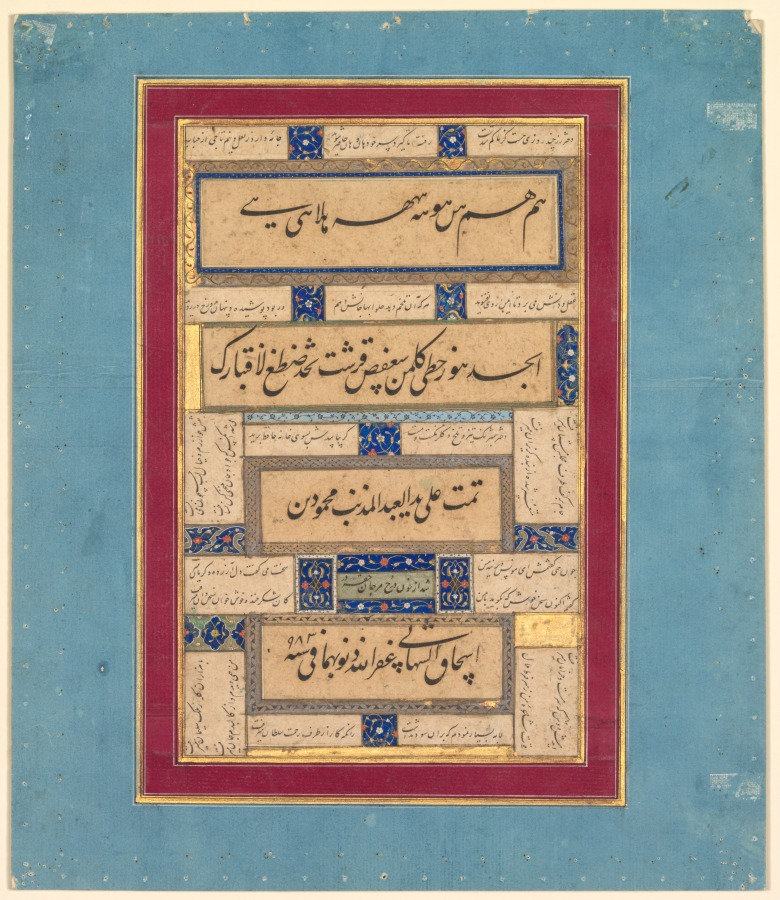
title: Calligraphic exercises and verses of Hafiz (Persian, about 1325–1389) (verso)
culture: Persian, Uzbekistan, Bukhara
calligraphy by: Mahmud ibn Ishaq al-Shahabi (Persian, active mid- to late 1500s)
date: 1575–76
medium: Gum tempera, ink, and gold on paper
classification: Calligraphy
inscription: In center, Persian exercises including on the second line down the “abjad” letters of numeration followed by calligrapher’s signature, in nasta‘liq script: Done by the hand of the sinful slave Mahmud ibn Ishaq al-Shahabi, may God forgive his sins, in the year 982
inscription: Persian verses above from a ghazal of Hafiz (Persian, 1325–1389), in nasta‘liq script: For some days now the Daughter of the Vine has been lost to us,/ Gone away to tend to her own affairs. Be alert and prepared (as a search party)./ Her dress is of rubies and she wears a tiara of delicate glass./ She carries off wisdom and knowledge. Till you feel safe and secure from her, remain alert!/ Whoever will bring her bitter presence to me, I will give him sweet confectionaries (halwa) in exchange,/ And should she be hiding in disguise in the underworld, go down (and seek her out)/ The daughter of the dark-colored (vine) is quick-tempered, petulant, rose-colored and drunk./ Should you find her, take her towards Hafiz’s house.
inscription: Persian verses below, continued from above, in nasta‘liq script: I saw her last night, sauntering and tipsy./ A cup in hand, she was heading towards a gathering of the drunk/ I was so vexed that my poetic powers/ Became distraught and fled away from me/ She was harboring thoughts of Khwarazm and the shores of the Oxus/ With a thousand complaints she was leaving the Kingdom of Solomon/ Gone would be the person who knew the very soul of poetry as no one else./ I was witnessing this and my soul was seeping out of my body/ I protested and much lamented but to no avail/ For this was a matter for the Sultan’s compassion to tend.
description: This fine calligraphic work is signed and dated by a calligrapher who was highly regarded in both Safavid Iran and Mughal India. Mughal albums typically had a painted portrait or figural scene on one side, and a work of calligraphy on the other. The British civil servant Sir Charles Forbes made his album following that format. The verses are a lament over a lack of wine, beginning: For some days now the Daughter of the Vine has been lost to us, Gone away to tend to her own affairs. Be alert and prepared as a search party. Her dress is of rubies, and she wears a tiara of delicate glass.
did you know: The work was part of an album of paintings collected in India before 1811 by a Scottish politician who worked for the British East India Company.